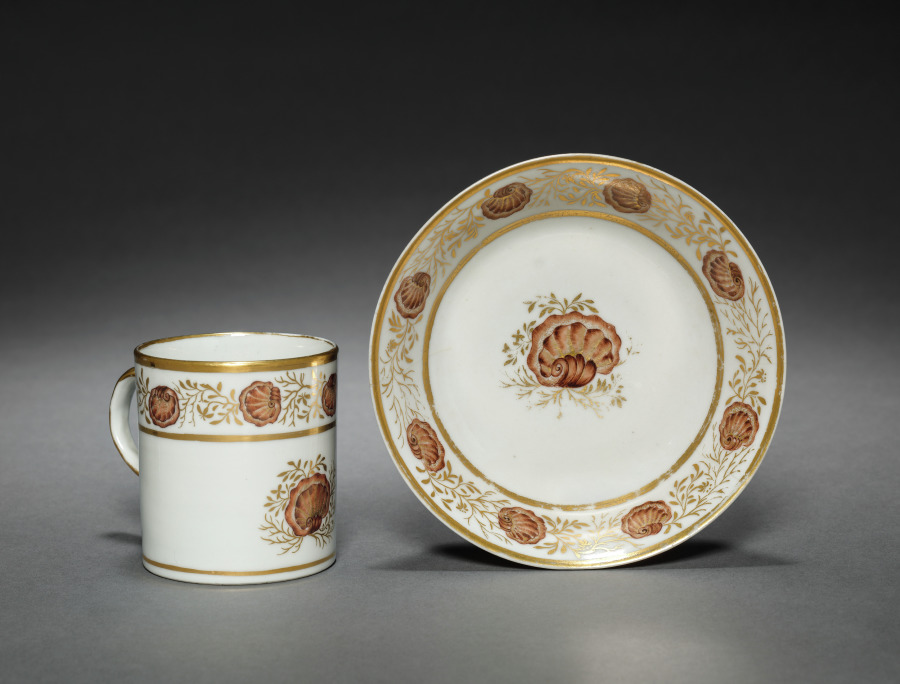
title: Cup and Saucer from Oliver Wolcott, Jr. Tea Service (3 of 6)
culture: Chinese Export porcelain, late 18th-early 19th century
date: 1785–1805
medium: porcelain, sepia enamel, gold leaf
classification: Ceramic